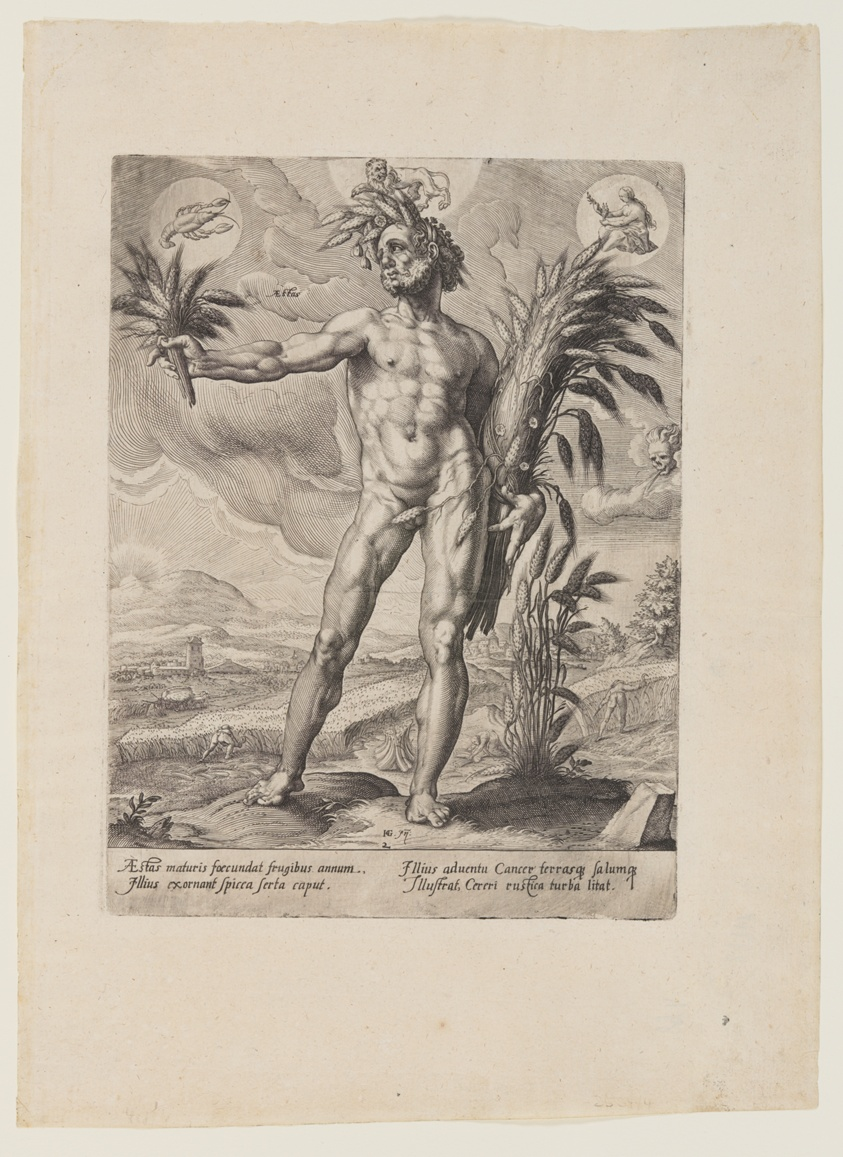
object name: Print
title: Summer, from The Four Seasons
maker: Matthäus Greuter (German, 1564 or 1566–1638); after Hendrick Goltzius (Dutch, 1558–1617)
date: c. 1589-1600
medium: Engraving on ivory laid paper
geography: Germany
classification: engraving; paper; print; prints and drawing